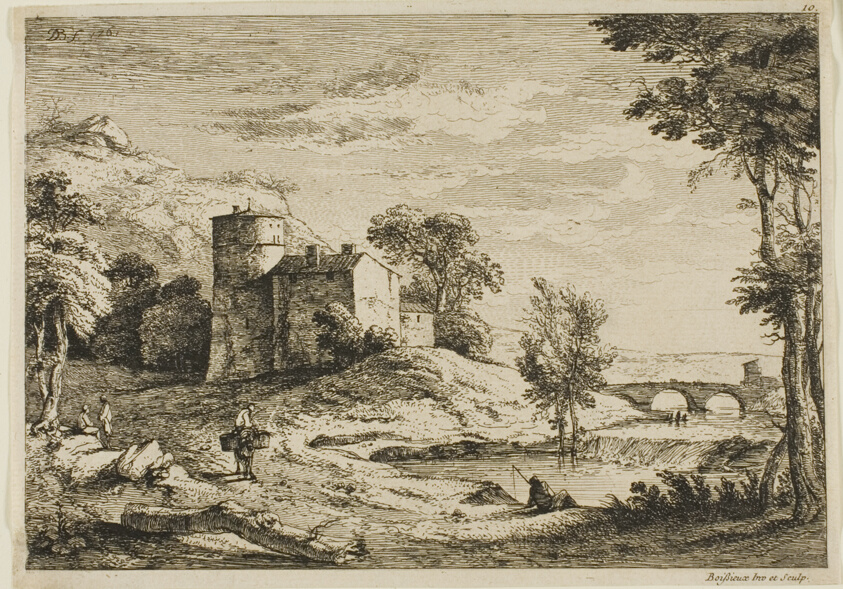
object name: Print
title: Peasant Riding on a Donkey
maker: Jean Jacques de Boissieu (French, 1736-1810)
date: 1763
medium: Etching on paper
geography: France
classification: etching; print; prints and drawing